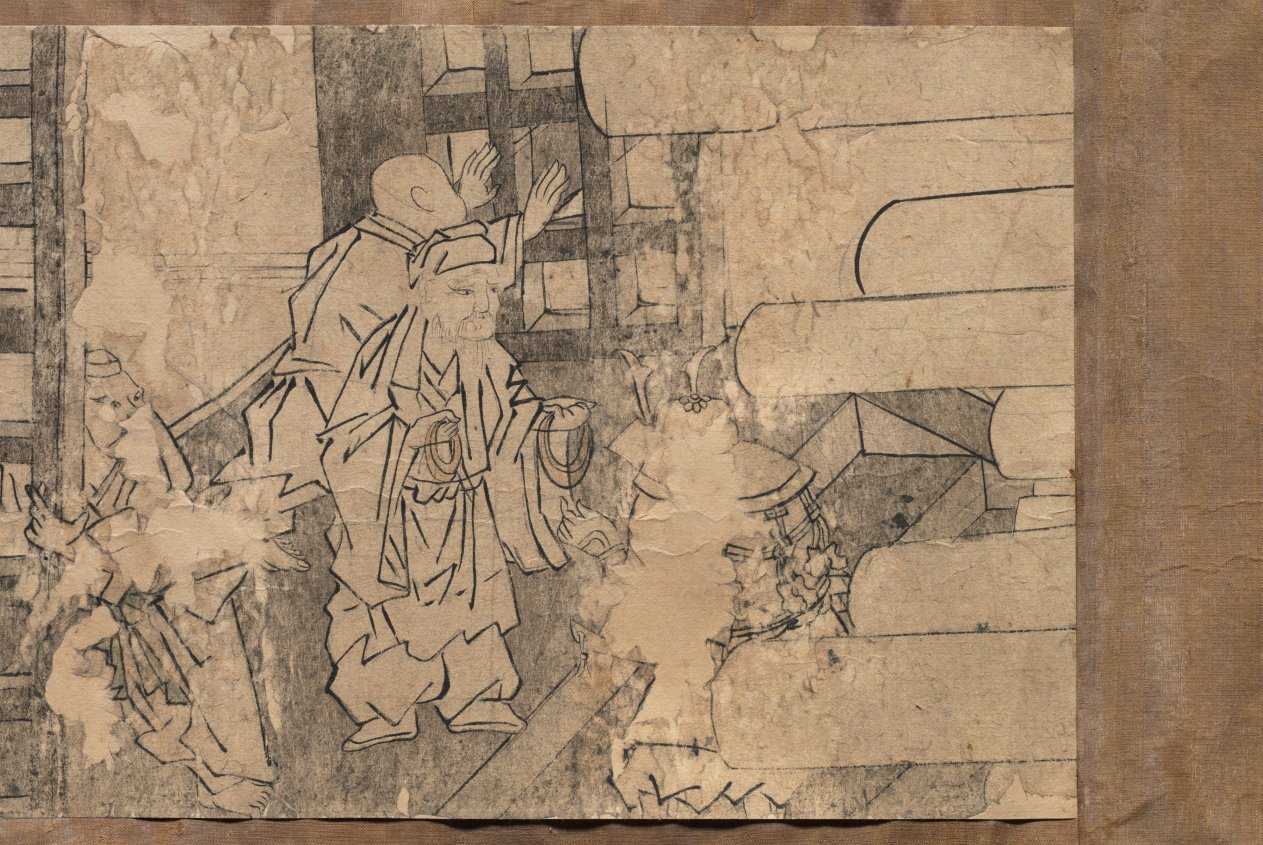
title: Oeyama Engi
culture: Japan, Edo period (1615–1868)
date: 1615–1868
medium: one of a pair of handscrolls; ink and color on paper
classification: Painting